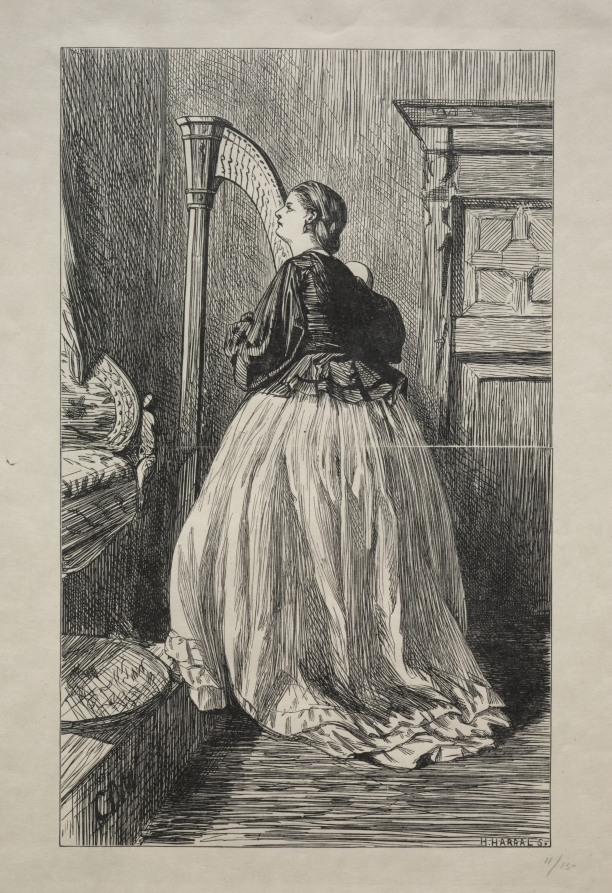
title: O Sing Again that Simple Song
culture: England, 19th century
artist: George Louis Palmella Busson Du Maurier (British, 1834–1896)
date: 1862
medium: wood engraving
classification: Print